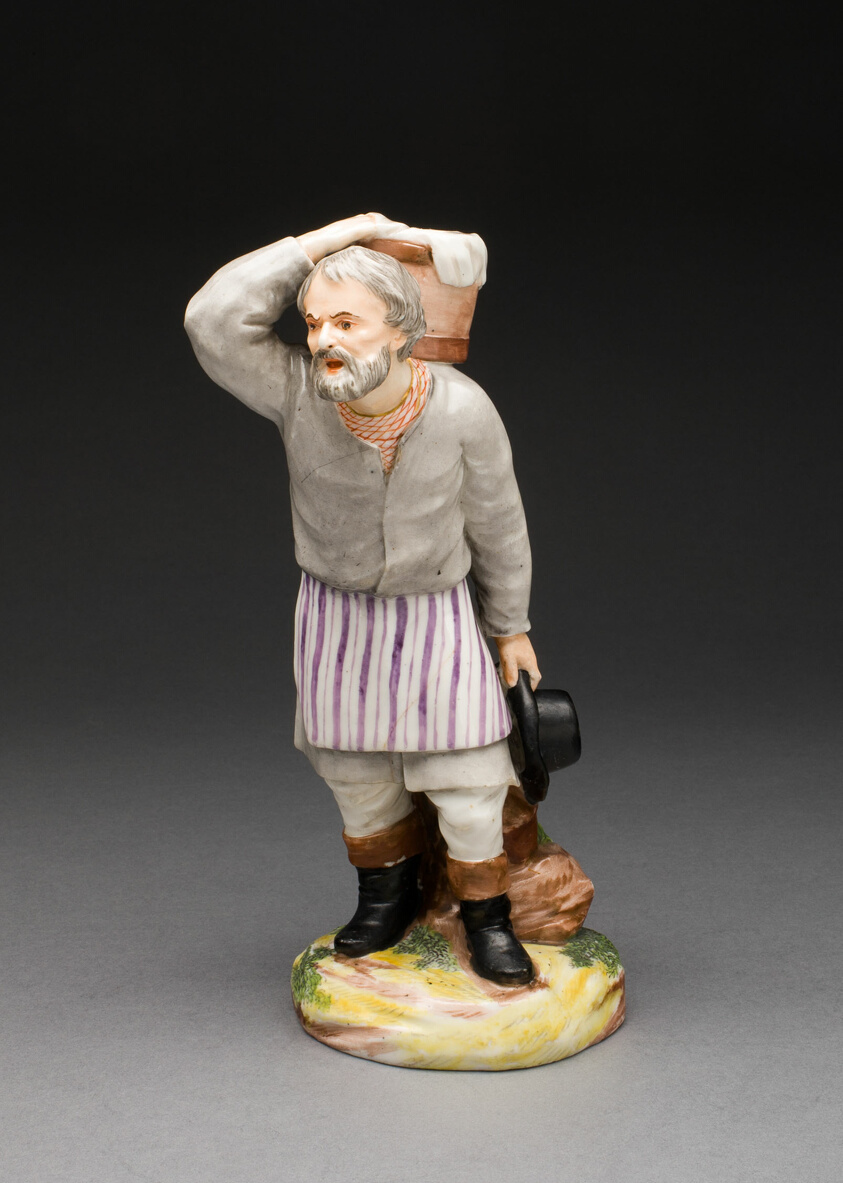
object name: Ceramics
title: Ice Cream Peddler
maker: Modeleled by Jean Rachette (French, 1744-1809); Russian Imperial Porcelain Factory; Russian, founded 1744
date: c. 1779/96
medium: Porcelain with polychrome enamel decoration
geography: Saint Petersburg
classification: sculpture; porcelain; european decorative arts; ceramics